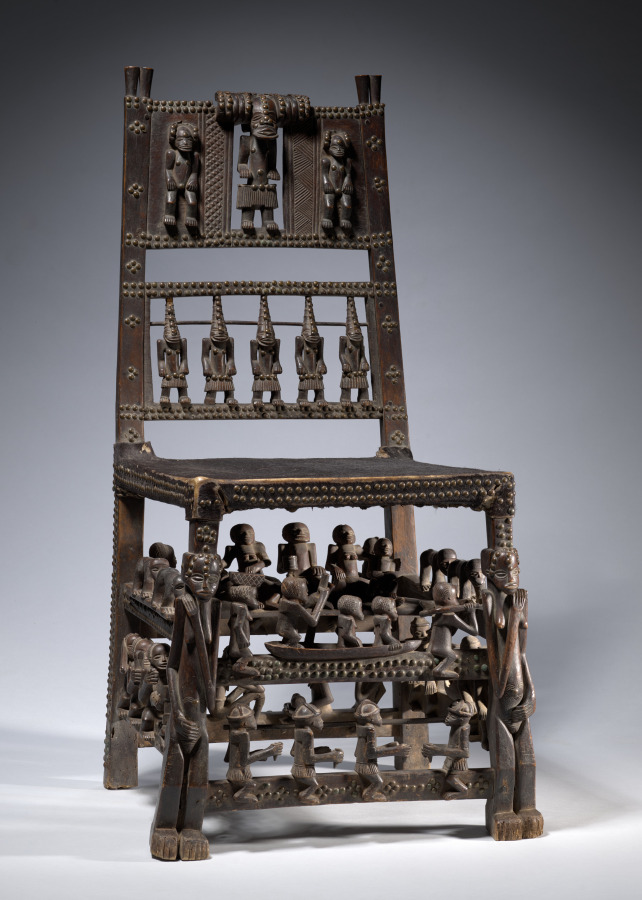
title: Ceremonial Chair or Throne (citwamo ca mangu)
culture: Africa, Central Africa, Angola, Chokwe-style carver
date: 1800s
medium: Wood, upholstery studs, leather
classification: Furniture and woodwork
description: This citwamo ca mangu chair bears over 40 sculpted figures arranged in complex compositions across the chair’s top rail (back), stretchers (rungs), and legs; all symbolize the power of Chokwe supreme chiefs. Such chairs typically bear a dozen or fewer figures. Scenes of royal life and power wrap around the seat, reinforcing how the chief and his family are at the center of their polity and its business.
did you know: Starting around the 1500s, Chokwe and other African leaders and traders received fine chairs as gifts from Portuguese traders. Chokwe leaders adapted this symbol of power as their own, using it in tandem with stools, an earlier kind of prestige seat.